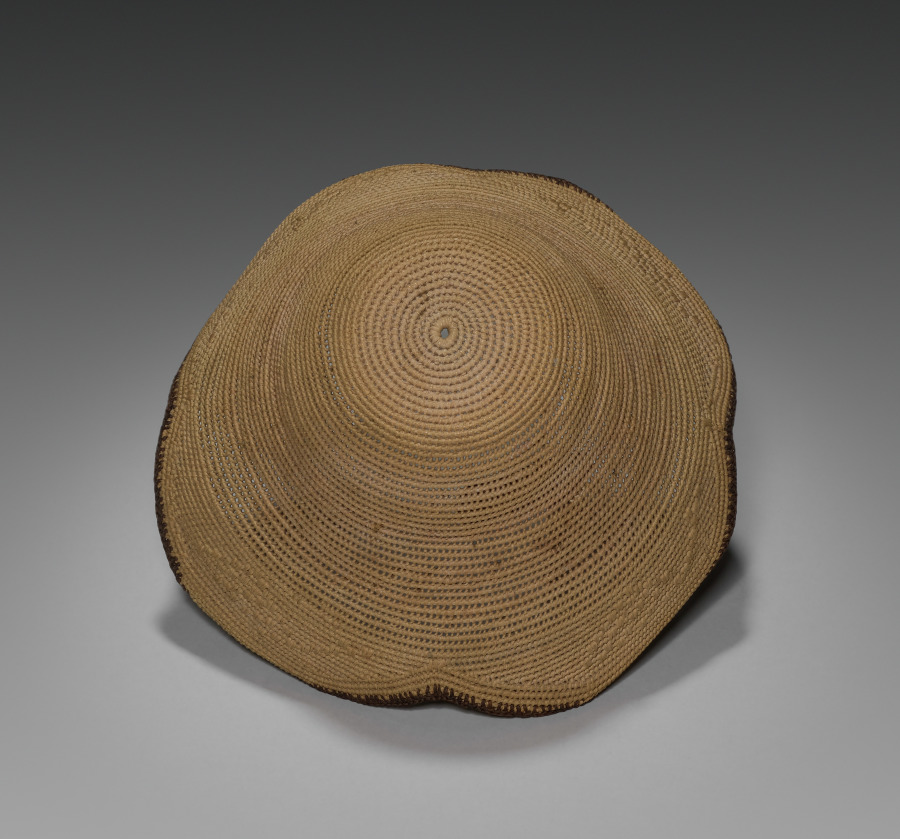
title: Hat (laket)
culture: Africa, Central Africa, Democratic Republic of the Congo, Kuba-style maker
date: early 1900s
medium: Raffia and dye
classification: Garment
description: Titled Kuba men and prominent women wear the laket, a small ornate dome-shaped hat. An essential fashion item of adult men in good social standing, it focuses special attention on the head as a significant marker of individual identity, ethnic affiliation, status, and role in society. This prestige object is secured on the crown of the head with a nine-and-a-half-inch metal pin that pierces through the hat onto a clump of hair. This laket is made from raffia palm fiber coiled into threads and woven in different patterns. There are two examples of the laket: the plain type with the flat top, and the more elaborate type called the laket mishiing.